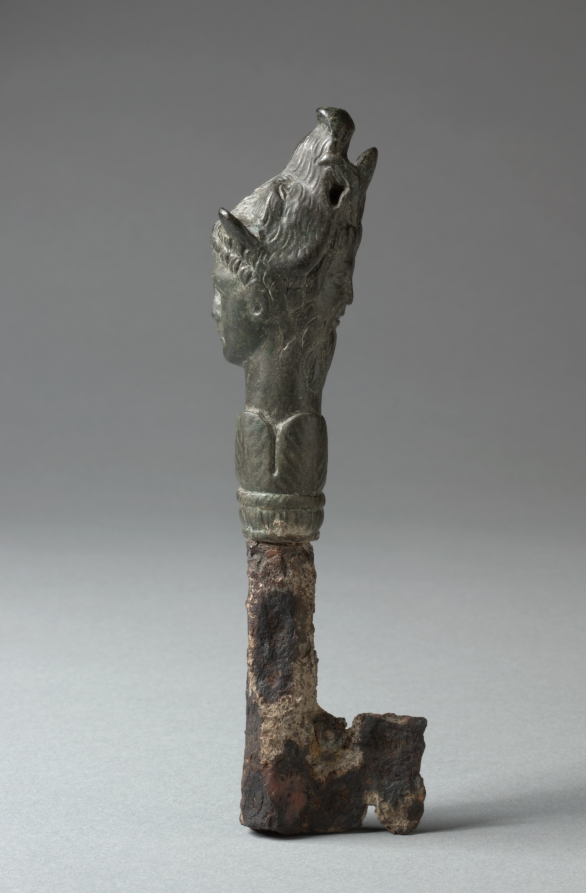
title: Key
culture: Italy, Roman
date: 1–100 CE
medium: iron tang, bronze handle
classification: Metalwork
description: Cleverly designed with an iron bit attached to a bronze handle, this key can be admired from all angles. While the handle terminates in the head of a ferocious boar, farther down are back-to-back heads of Mercury—his wings formed from the ears of the boar—and his goat-legged, horned son, Silvanus (also known as Pan). Given the rustic nature of the heads, scholars have suggested that the key might once have unlocked a country villa.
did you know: The bronze handle of this key combines three heads: of a boar, Mercury, and Silvanus.